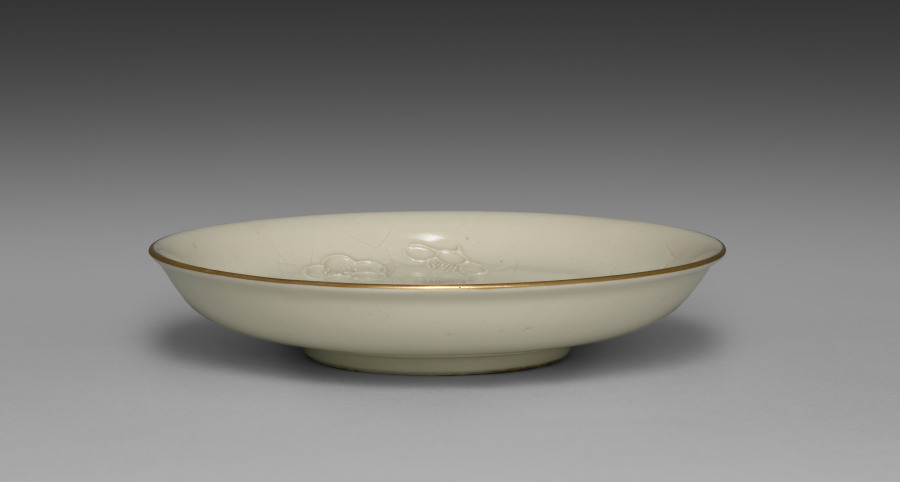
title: Medium-sized Dish from Dining Set with Plum Blossoms and Cracked-Ice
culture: Japan, Meiji period (1868–1912)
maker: Seifū Yohei II (Japanese, 1844–1878)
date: c. 1875–78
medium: Porcelain with molded designs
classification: Ceramic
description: Each item in this set has a delicate low-relief design of flowering plum branches over scattered, intersecting lines meant to resemble the cracked-ice surface of a frozen body of water and is signed on the base in gold pigment. While Yohei II produced many fine works in underglaze blue, like those produced by Kiyomizu Shichibei, he also made works in quite different styles later in his career, from the early 1870 s. In 1873, he was appointed purveyor to the Industrial Center of Kyoto Prefecture, a designation associated with Kyoto’s efforts to reach an international market through the port of Kobe; and from 1875 until his death, he was involved in national-level projects to present Japanese ceramics across the world. It was during this period that Yohei III was apprenticed to Yohei II, and it has been suggested that this set may in fact be an early example of Yohei III’s work, which he signed with his teacher’s name. Decorated with flowers resembling Japanese textile motifs, the set calls to mind the design of Yohei II’s pair of vases with plum blossoms in the Victoria and Albert Museum. Here, the elaborate trees created for a formal public exhibition setting have been translated into the approachable blossoms of the genteel domestic environment. While the designs are consistent across the pieces, each raised flower petal and pistil and each incised line in the ice was done by hand, so the cups, bowls, and dishes are similar yet unique. The bottoms of two boxes once identified the set’s owner, but the information has been deliberately obscured with black ink. However, inscriptions still visible appear to indicate two occasions, once at the end of July 1886 , and once again in June 1916 , when parts of the set were requested from Hokura in Niigata Prefecture. The location corresponds to a neighborhood in the present-day city of Jōetsu. The surname Tsuji 辻 also appears on a paper tag affixed to one of the box cloths. Future research may possibly reveal more about their provenance. A vase by Yohei III in a private collection combines the formal grandeur of the Yohei II vases in the Victoria and Albert Museum with the gentler design of this dining set, placing flowering plum trees against soft, scalloped-edge clouds resembling those in golden screens.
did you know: The dining wares have a creamy white coloration that the four boxes containing them identify as Korean in style.